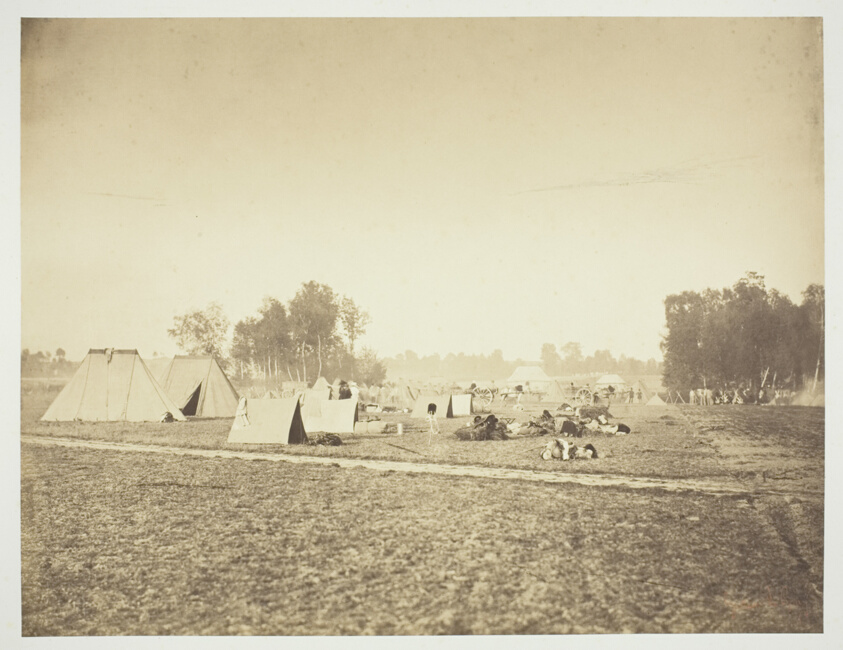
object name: Photograph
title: Tents and Military Gear, Camp de Châlons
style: 19th century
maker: Gustave Le Gray (French, 1820–1884)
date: 1857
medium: Albumen print, from the album "Souvenirs du Camp de Châlons"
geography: France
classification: albumen silver print; photographic process; photography; photograph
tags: Paris, documentary